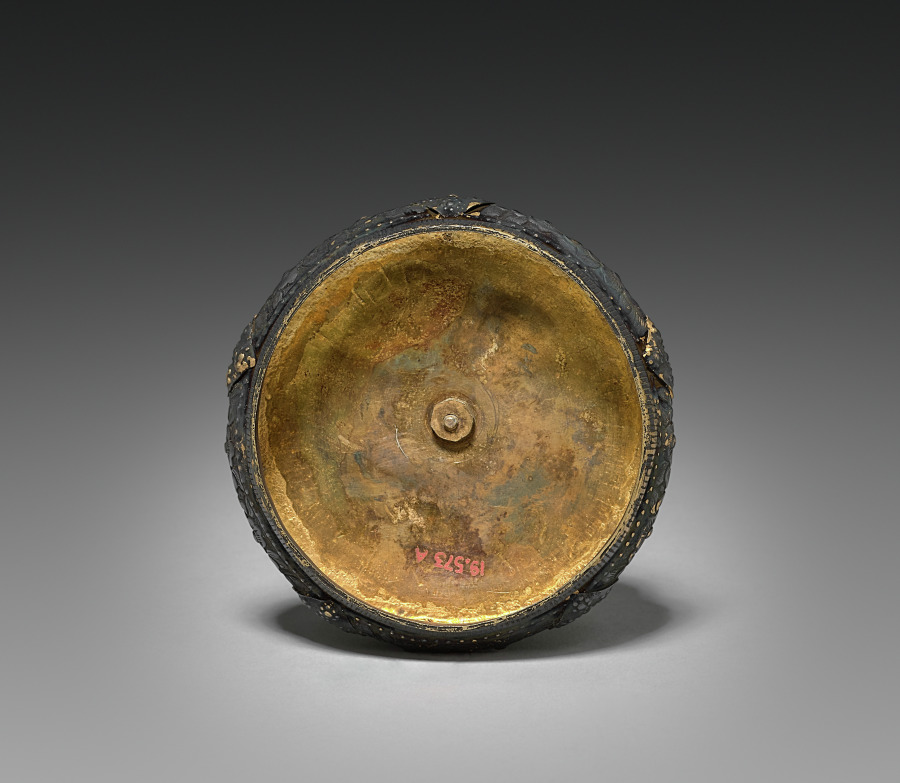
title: Burial Urn (lid)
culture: Siam, 19th century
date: 1800s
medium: gold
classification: Metalwork